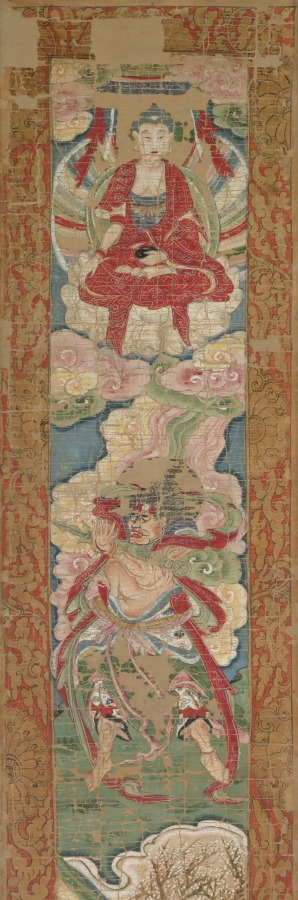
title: Buddhist Panel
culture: China or Korea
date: 1600s–1700s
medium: Hanging scroll; ink and color on paper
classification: Painting